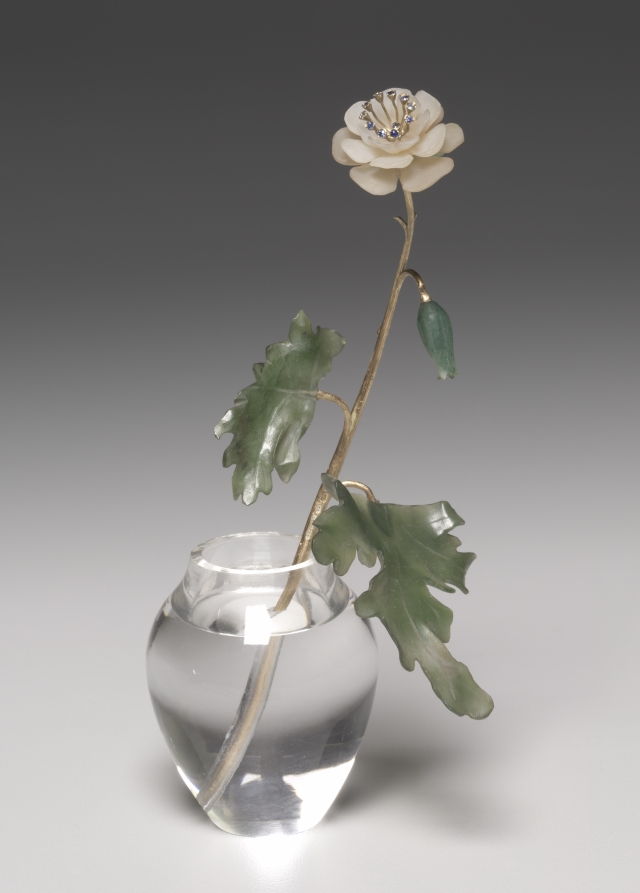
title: Flower Study of an Anemone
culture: Russia, St. Petersburg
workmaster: Henrik Wigström (Russian, 1862–1923)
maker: House of Fabergé (Russian, 1842–1918)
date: c. 1905–15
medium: mat white stone, gold, sapphires, jade, rock crystal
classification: Miscellaneous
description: This flower study depicts a wild anemone in bloom. Fabergé’s inspiration for his flower studies is said to have come from the floral brooches of precious stones that were made in the 1700s for Catherine the Great as well as from the Japanese art of flower arranging, known as ikebana. Small and delicate, Fabergé’s flower studies were given as intimate gifts to friends by the tsarina and others in the court. She also liked to take them around to wherever the imperial family was residing as a reminder of spring during the harsh Russian winters.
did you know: The stems of Fabergé’s flower studies are set into little basins carved from rock crystal to resemble pots of water.